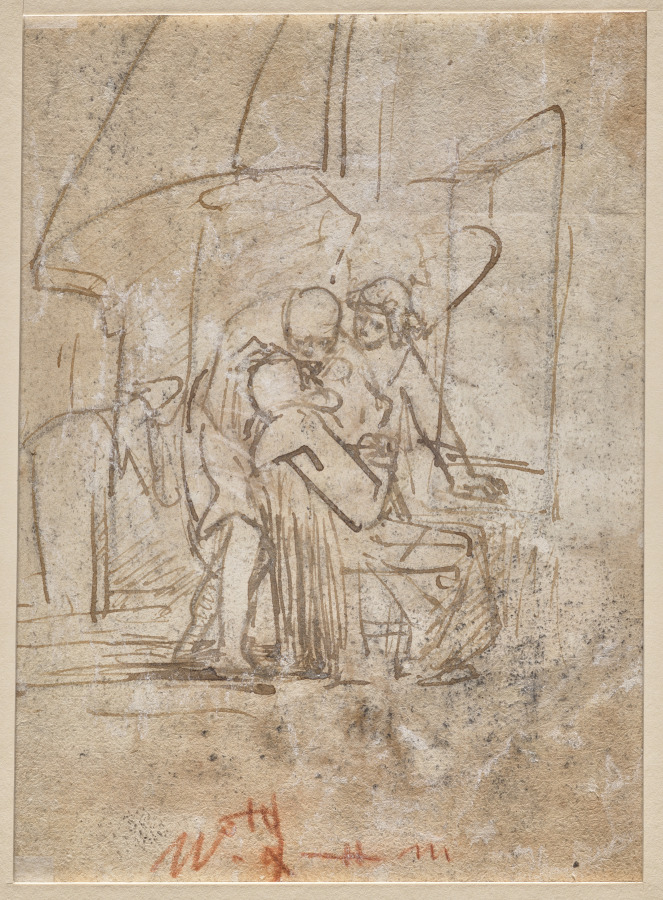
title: The Healing of Tobit (verso)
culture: Netherlands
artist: Ferdinand Bol (Dutch, 1616–1680)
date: c. 1630s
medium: pen and brown ink (verso)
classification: Drawing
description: Ferdinand Bol was one of the most prominent pupils and followers of Rembrandt van Rijn, for whom drawing played a central role in his workshop practice and teaching. This image of a man within a darkened interior before a window—perhaps a scholar or philosopher—is similar to compositions of saints as well as portraits that Rembrandt made in the 1630s and 1640s. Bol was quite interested in the theme, portraying similar figures in at least two paintings, ten drawings, and four etchings. Like Rembrandt, he employed an expressive but controlled use of ink wash, emphasizing the psychological interiority of the sitter with dramatic shading. The verso (back) of the drawing features a quick sketch by Bol after another of Rembrandt’s compositions, Tobit Healing his Father’s Blindness, 1640-45, held today in the CMA’s collection (1969.69).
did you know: Ferdinand Bol’s subtle and controlled use of ink wash reveals a large trunk on the floor, while retaining bright highlights on the figure, book, and globe on the windowsill.